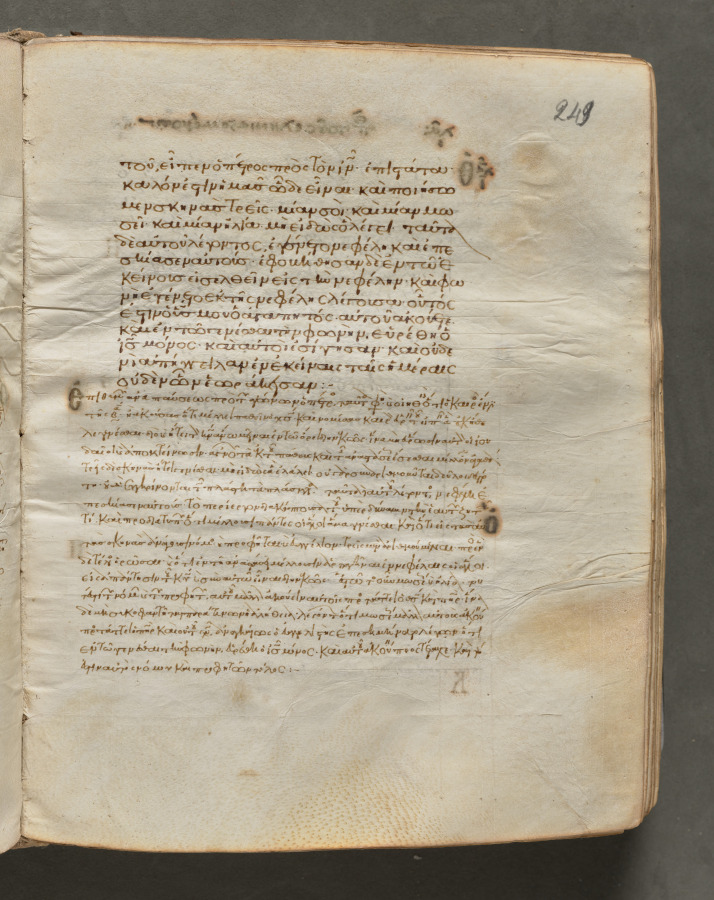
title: Text, folio 249 (recto), from a Gospel Book with Commentaries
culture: Byzantium, Constantinople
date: c. 1000–1100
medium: ink, tempera, and gold on vellum; leather binding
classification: Bound Volume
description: Each of the four gospels in this book opens on a page with brilliantly illuminated borders depicting the author of the text as well as birds—principally peacocks, symbols of the immortality of the soul—and fountains, representing the fountain of life and the salvation of the soul. This volume consists of 428 leaves with texts in Greek. Its level of sophistication suggests that it was probably written and decorated in a monastery in Constantinople.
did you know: Gospel books were carried in procession through Byzantine churches.